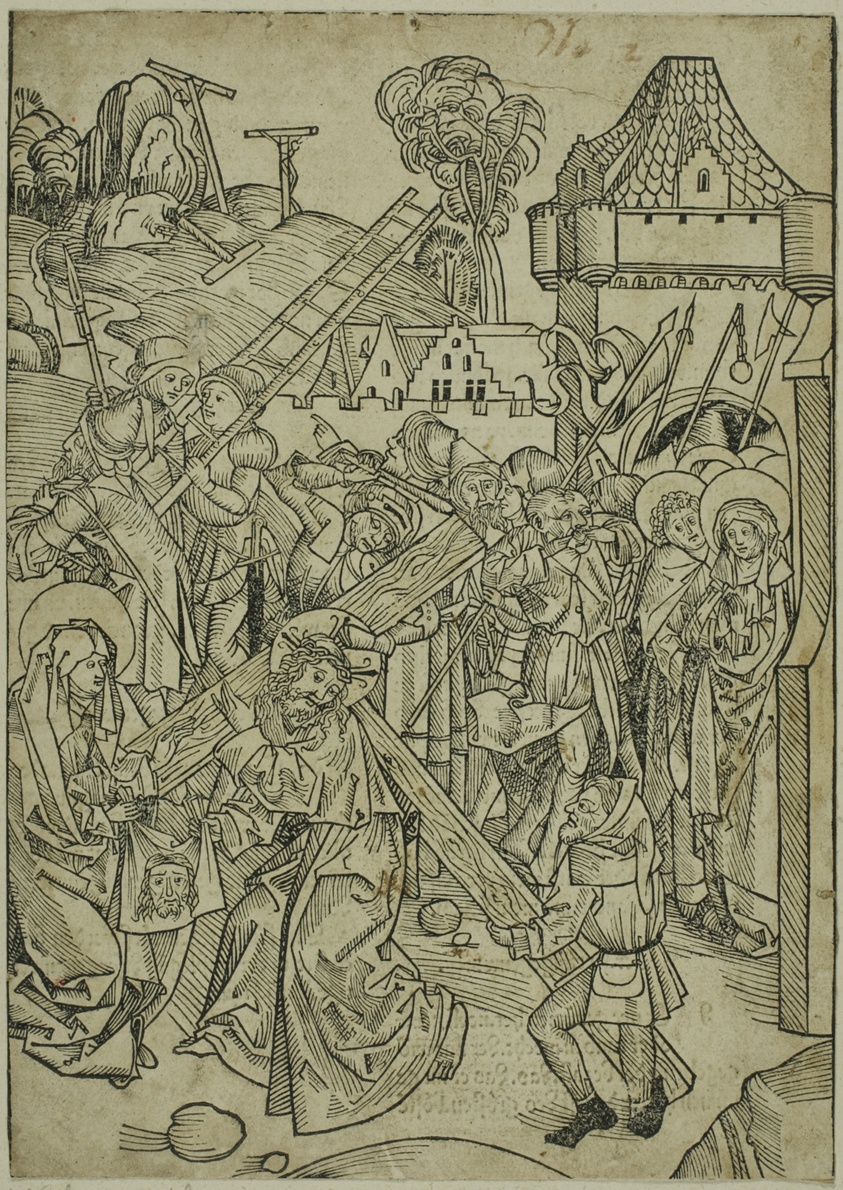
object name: Print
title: Christ Bearing the Cross, page 81, from the Treasury (Schatzbehalter)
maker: Michael Wolgemut and Workshop (German, 1434/37–1519); published by Anton Koberger (German, 1440–1513)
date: 1491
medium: Woodcut on cream laid paper, laid down on ivory wove album sheet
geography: Germany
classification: woodcut; print; prints and drawing